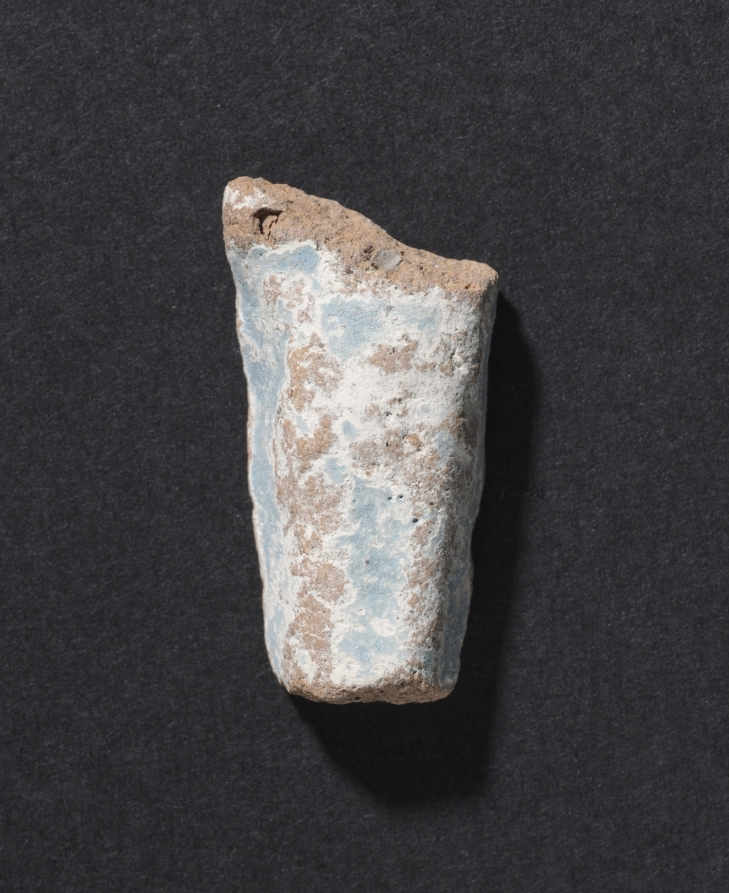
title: Shawabty of Ditamenpaankh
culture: Egypt, Late period (715–332 BCE), Dynasty 25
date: 715–656 BCE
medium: terracotta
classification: Funerary Equipment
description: High demand for shawabtys in the Late Period, a time when as many as 400 or more shawabtys were placed in the tomb with the deceased, gave rise to a specialized container for storing them: the shawabty box. This example is inscribed for the lady of the house, Ditamenpaankh, and was probably one of a pair originally made for her. The single-masted boat on the box's lid is perhaps an allusion to the pilgrimage of the deceased to the holy city of Abydos, the cult city of Osiris, king of the dead. The shawabtys inside are crude, mass-produced examples cast in an open mold. Made of terracotta, their blue paint imitates more costly shawabtys made of faience. As for the shawabty spell, it has been removed from its traditional location on the shawabty's front and relocated onto the sides of box, where it needed only to be written once, thus expediting production.